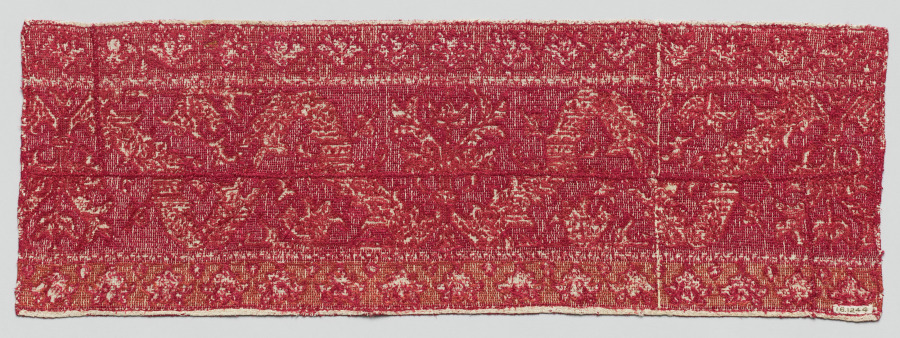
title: Fragment of a furnishing textile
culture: Africa, North Africa, Morocco, Azemmour, Moroccan embroiderer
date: possibly 1700s or 1800s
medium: Linen, silk, and dye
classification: Embroidery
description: Small bands like this decorated furnishings. They are distinctive to Azemmour, Morocco, where Jewish women embroidered them at home. This band’s red designs are floral and geometric; the scrolls may be abstracted dragons. Its Renaissance-era motifs reflect centuries of cross-Mediterranean exchange (especially with Portugal, which ruled Azemmour from 1513 to 1541). Such designs traveled to North Africa via printed pattern books. Patterns were transferred onto fabric, then the backgrounds were covered with filling stitches: plait and cross-stitches were used here. The production of these embroideries ceased around the mid-1900s because of cost and changing fashions.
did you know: This textile represents the work of at least four individuals: the person who prepares the fibers, the weaver, the dyer, and the embroiderer.